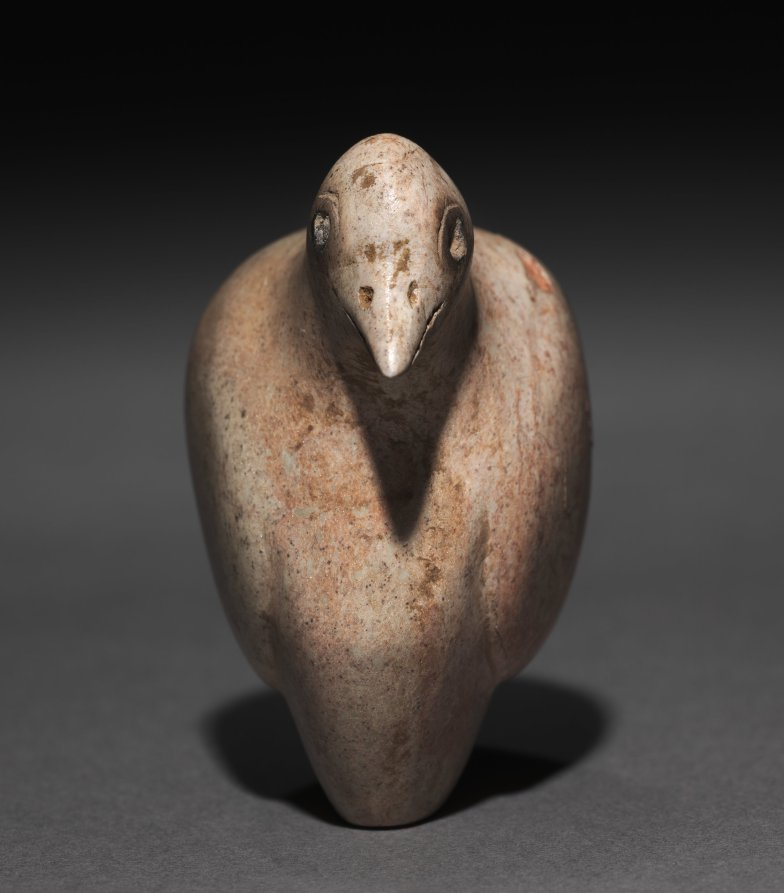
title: Nesting Quail Stamp Seal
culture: Iran, Lake Van region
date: 4000–3000 BCE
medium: dickite stone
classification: Sculpture